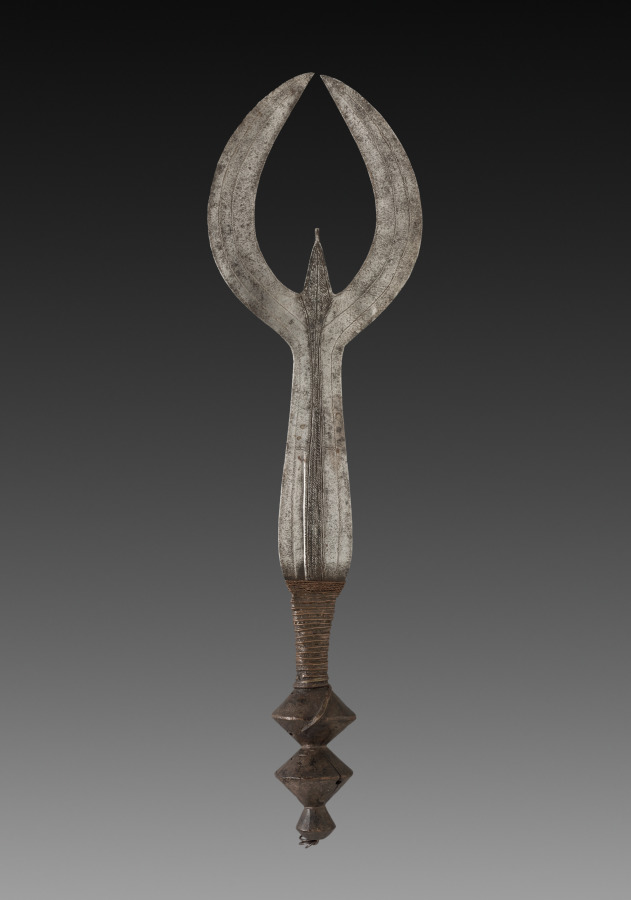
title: Sword (ngulu)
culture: Ngombe, Doko, or Iboko people, Democratic Republic of Congo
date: late 1800s to early 1900s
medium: Iron alloy, wood, and copper alloy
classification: Arms and Armor